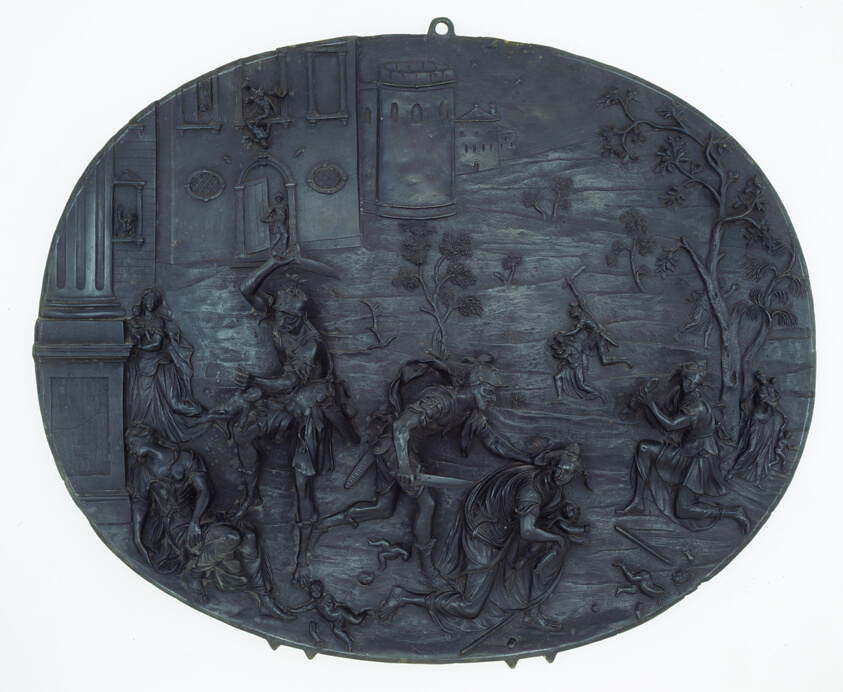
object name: Sculpture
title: The Massacre of the Innocents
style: 18th Century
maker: Francesco Bertos (Italian, active c. 1693–1733)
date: 1700/25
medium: Bronze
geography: Italy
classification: relief; Italian; sculpture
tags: violence, death, children, weapons, woman, women, swords, trees, castles, wall, murder, religion, religious, religious scenes, men, biblical, Christian subjects, Christianity